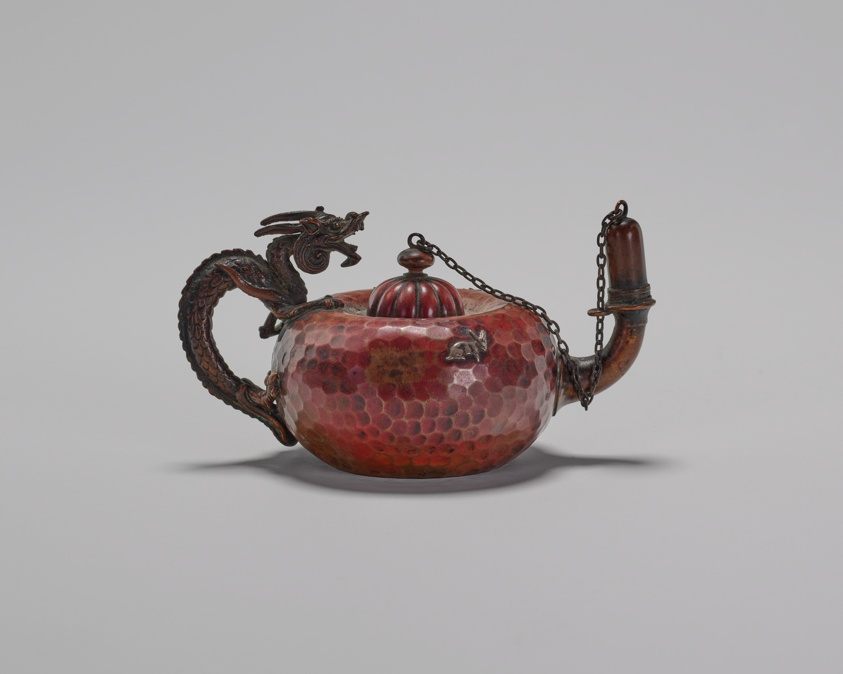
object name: Decorative Arts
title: Cigar Lighter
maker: Gorham Manufacturing Company (American, founded 1831); Providence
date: c. 1900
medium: Copper and mixed metals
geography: Providence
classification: american decorative arts; decorative arts